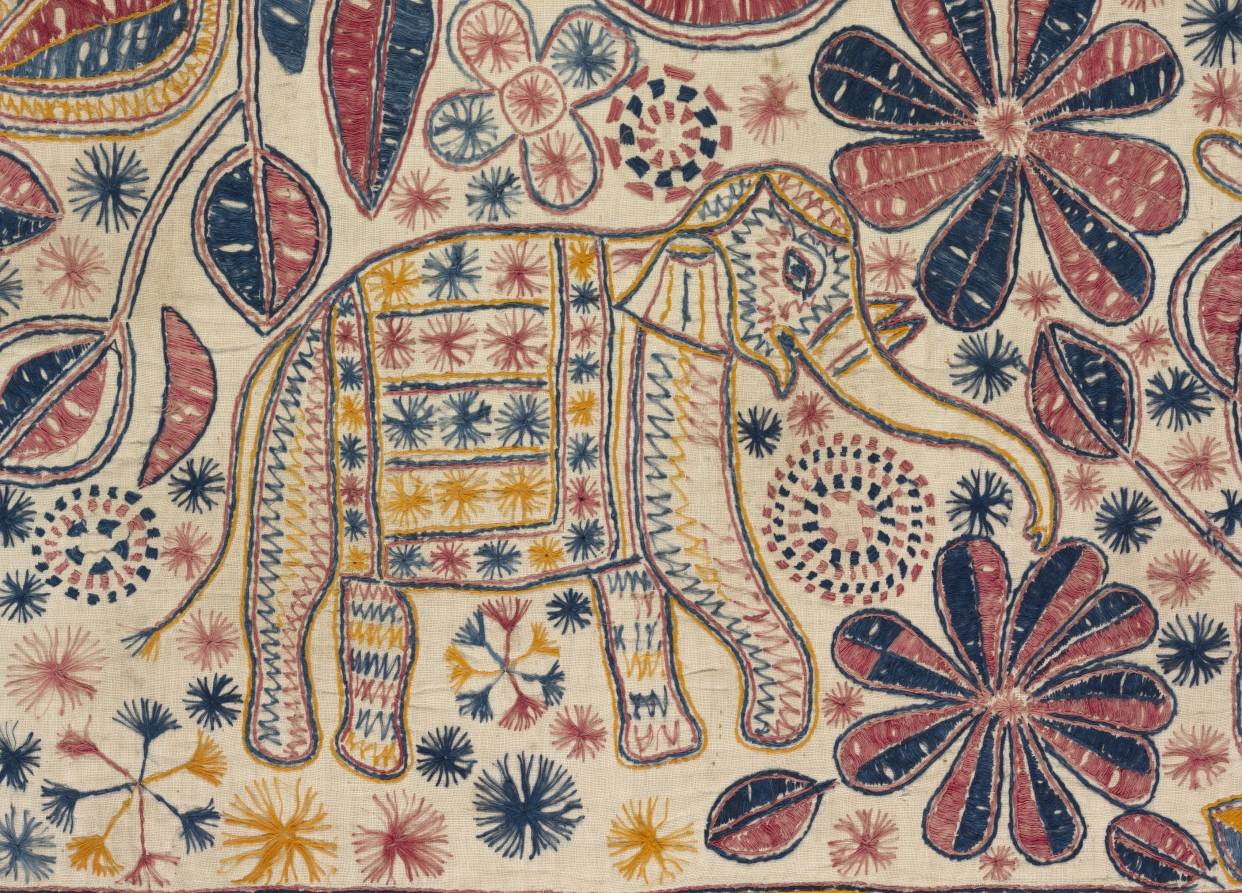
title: Kantha (Ceremonial Quilt)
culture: India, East Bengal, 19th century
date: 1800s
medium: embroidery: cotton thread on cotton tabby ground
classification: Embroidery